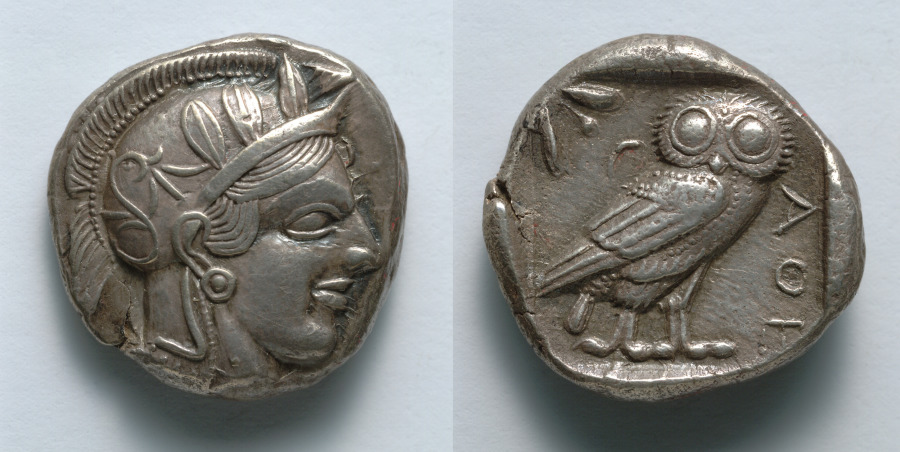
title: Tetradrachm: Head of Athena (obverse); Owl (reverse)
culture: Greek, minted at Athens (Attica)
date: 449–407 BCE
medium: silver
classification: Coins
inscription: ΑΘΕ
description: Incorporating the first three letters of the city name—ΑΘΕ—with then-iconic images of the patron goddess Athena and her owl, the Athenian tetradrachm was among the most widely traded and most recognizable coins of the ancient world. The olive leaves on Athena’s helmet and the small crescent moon behind the owl date this coin after the Persian Wars.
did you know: The basic design of Athenian tetradrachms is now back in use, on Greek one-Euro coins.